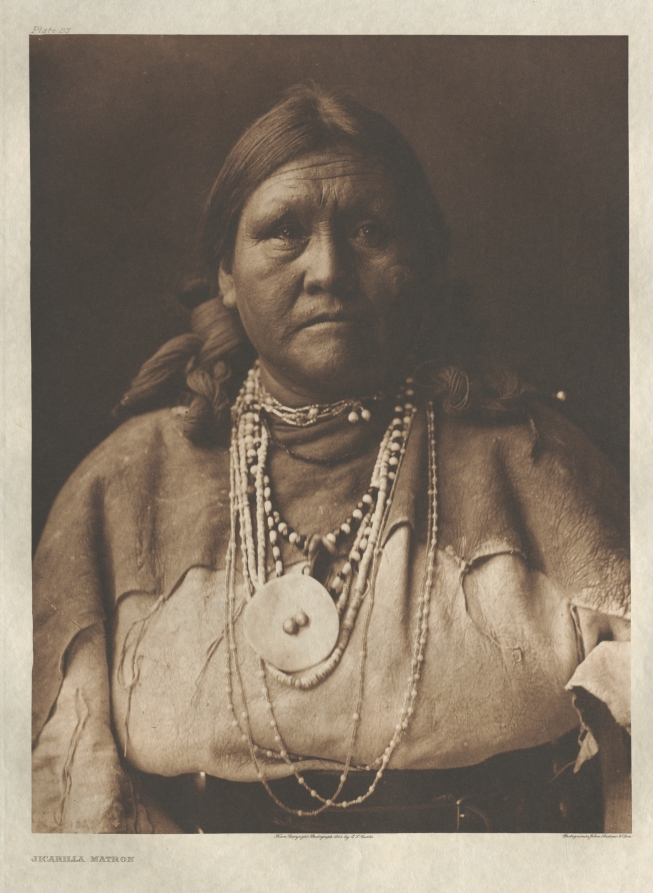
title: Portfolio I, Plate 23: Jicarilla Matron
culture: America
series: The North American Indian: being a series of Portfolios picturing and describing the Indians of the United States, the Dominion of Canada, and Alaska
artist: Edward S. Curtis (American, 1868–1952)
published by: The University Press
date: 1904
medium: photogravure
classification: Portfolio